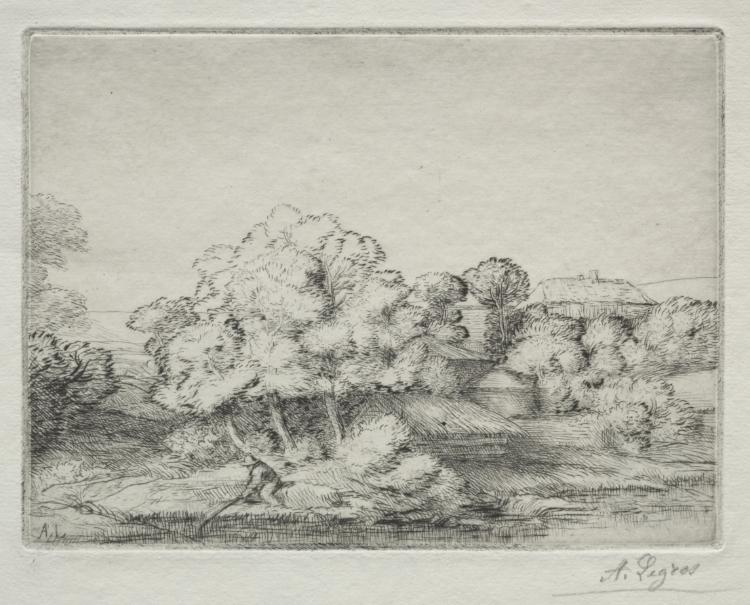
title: Hamlet near the Lake (Hameau près du Lac)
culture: France, 19th-20th century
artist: Alphonse Legros (French, 1837–1911)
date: c. 1857–1911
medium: etching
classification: Print